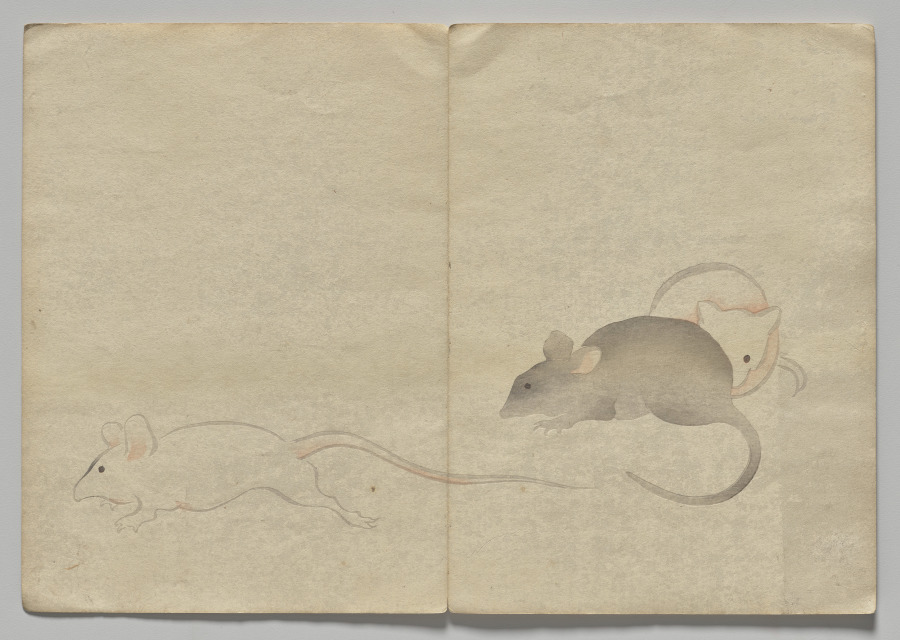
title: Scene from The Kōrin Picture Book (Volume 2)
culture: Japan, Edo period (1615–1868)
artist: Nakamura Hōchū (Japanese, d. 1819)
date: 1800s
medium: color woodblock printed book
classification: Bound Volume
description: Ogata Korin (1658-1716) was one of the most admired artists of Rimpa, or "decorative school painting." These books by the charming later-generation Rimpa artist Hochu record Korin's inventive designs.